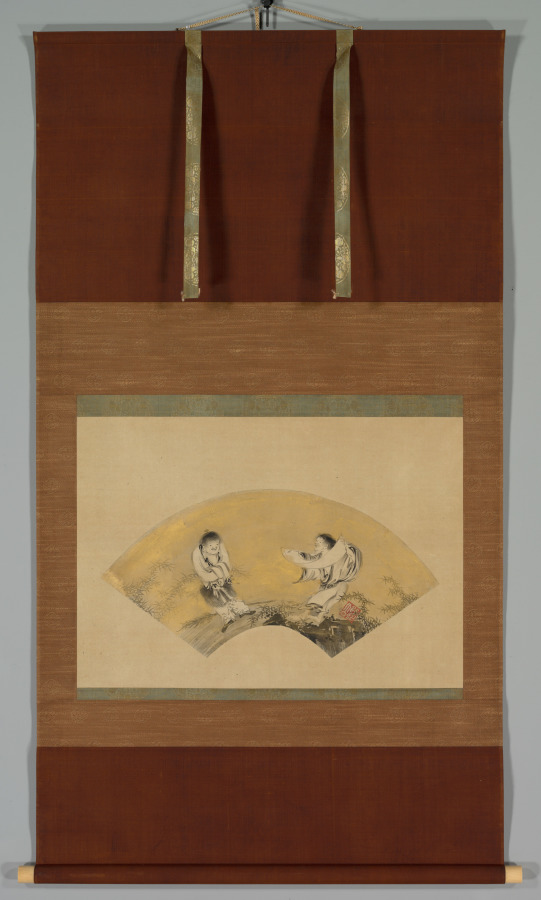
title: Hanshan and Shide (Kanzan and Jittoku)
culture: Japan, Muromachi period (1392–1573)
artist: Shikibu Terutada (Japanese, active mid-1500s)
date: mid-1500s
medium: Fan-shaped painting mounted as hanging scroll; ink and gold on paper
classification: Painting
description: These three fan-shaped paintings, now mounted as individual hanging scrolls, were once part of a set of 20 mounted on a folding screen. They portray the Chinese subjects, from left to right, of the scholar-official Pan Lang, Hanshan reciting his poetry to Shide, and a duck in flight above reeds. Pan Lang grew so fond of the mountain in his place of exile that when he was ordered back to the capital, he rode backward on his donkey so he could see it until it receded into the distance. Hanshan and Shide worked in the kitchen of a Zen monastery, but were actually reincarnations of the bodhisattvas Manjushri and Samantabhadra. The combination of a mandarin duck and reeds may have signified a level of attainment in Chinese civil service exams. All three paintings bear the seal of the Kantobased artist Shikibu Terutada. Shikibu was familiar with Kano school painting, but he also modeled his early style after that of the prominent Kanto-based Kenkō Shōkei (active about 1470–after 1523).